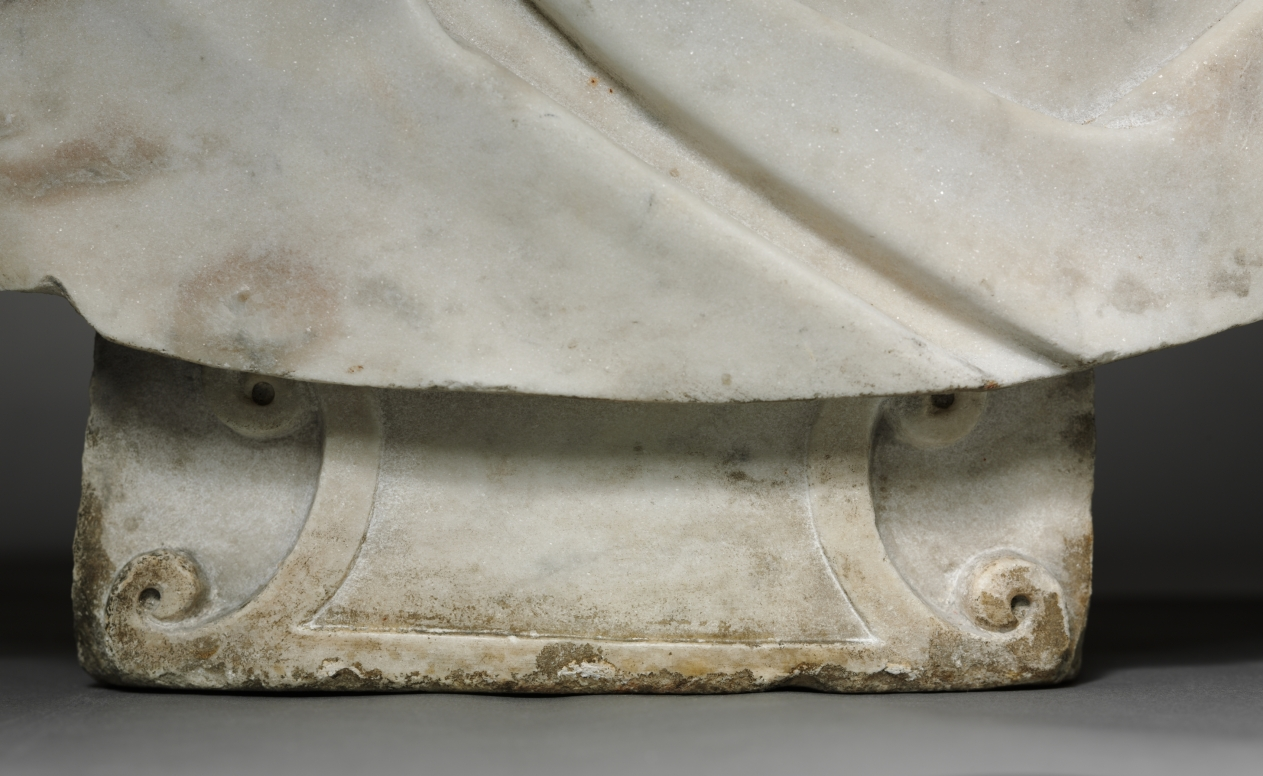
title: Bust of a Roman General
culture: Italy, 16th century or later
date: 1500s or later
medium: marble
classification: Sculpture